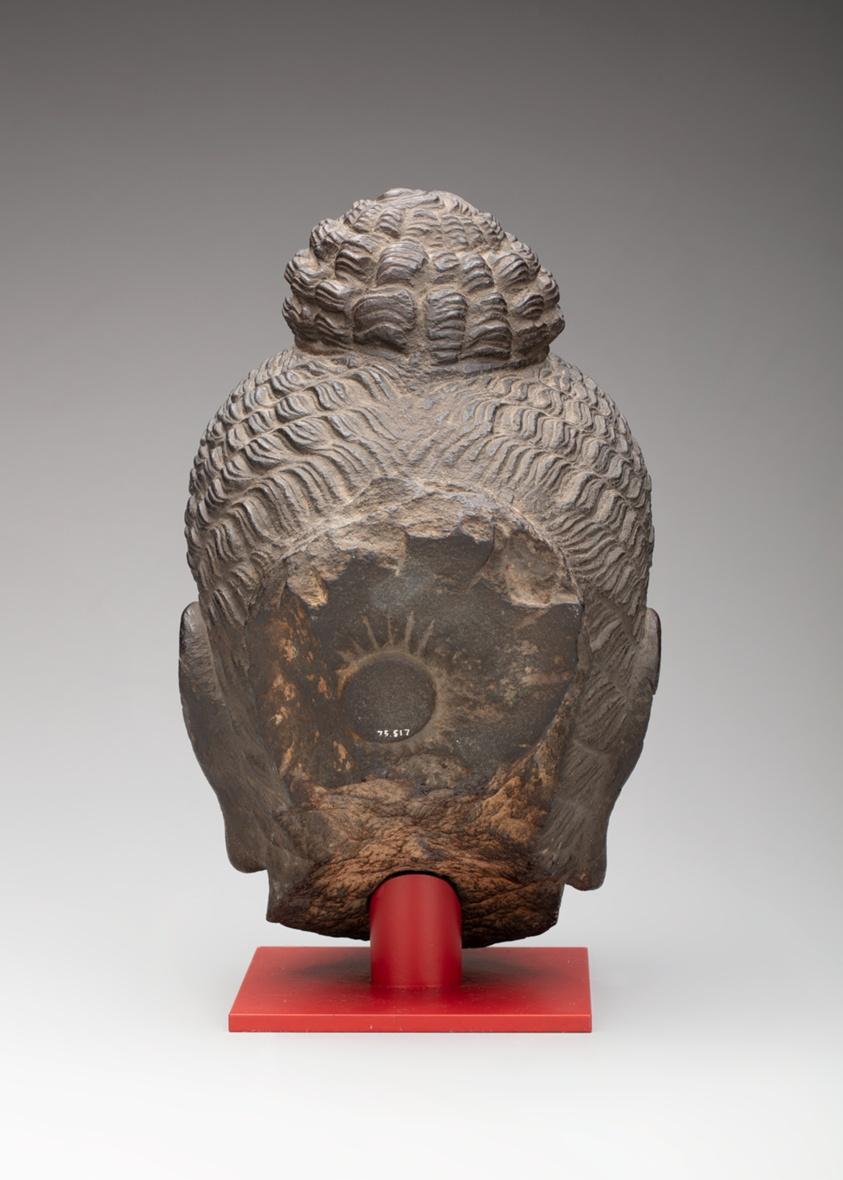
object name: Sculpture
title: Head of Buddha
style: South Asian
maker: Pakistan; Ancient region of Gandhara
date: Kushan period, 2nd/3rd century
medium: Gray schist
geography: Gandhara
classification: bust/head; stone (unidentified); stone; sculpture; asian art